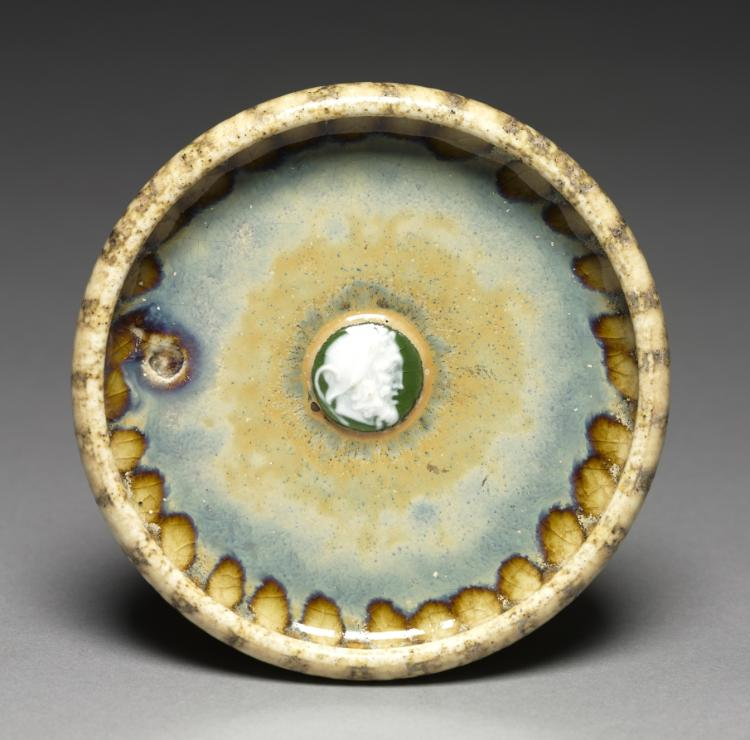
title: Dish with White and Green Cameo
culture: France, late 19th Century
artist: Taxile Maximin Doat (French, 1851–1939)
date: c. 1895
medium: stoneware and porcelain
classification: Ceramic